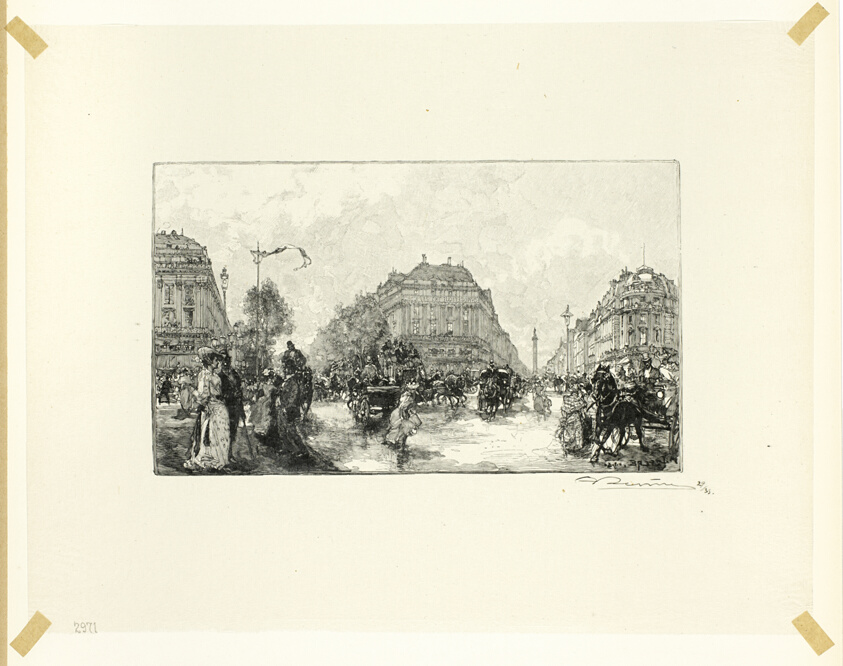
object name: Print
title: Place de l'Opéra, plate seventeen from Le Long de la Seine et des Boulevards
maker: Louis Auguste Lepère (French, 1849-1918); published by A. Desmoulins (French, active c. 1908-1910)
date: 1890, published 1910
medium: Wood engraving in black on cream Japanese tissue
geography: France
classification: wood engraving; print; prints and drawing